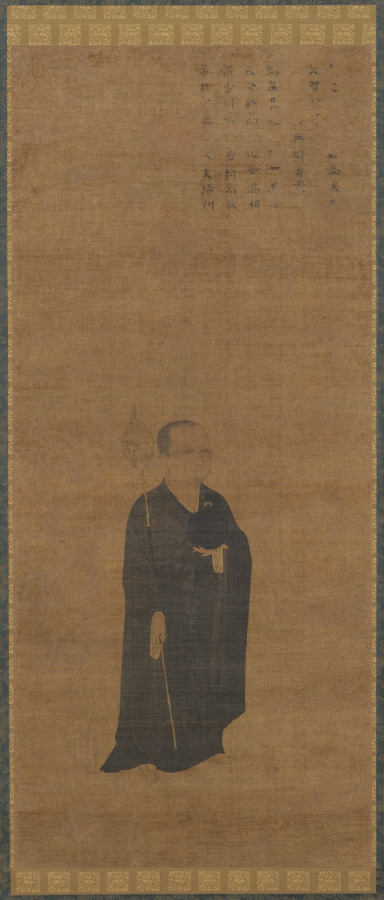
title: Portrait of Priest Dazhi (1048–1116), Master of Law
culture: China, Southern Song dynasty (1127-1279)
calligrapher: Liu Tao (Chinese, late 1000s–early 1100s)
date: 1100s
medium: Hanging scroll; ink and light color on silk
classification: Painting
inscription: Inscription by Liu Tao (late 1000s–early 1100s): Dignified with the perfection of the upasampada,/ His appearance is like his mind;/ Uncompromising and loftily aloof,/ His mind is like his appearance./ To say he is square, he proves to be round;/ He looks timid, yet his spirit is unbound./ Having no attachment, and holding no reins,/ Man and deities alike take refuge in him. (Translation by WKH, 1980)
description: Monk Yuanzhao, with the honorific title Dazhi Lüshi, Great Wisdom Master of Vinaya, is depicted here as an itinerant monk, holding his alms bowl in the left and staff in the right. In 1142, Emperor Gaozong had bestowed Yuanzhao with a posthumous title, mentioned in the inscription, which suggests that the portrait was made after the master’s death. A master of the Lü sect of Buddhism, with a calm benevolent smile on his face, Yuanzhao was active on Mount Tiantai and in Hangzhou. Later, Liu Tao, a southerner from Changxing, added the inscription. The eulogy reads: Dignified he is, perfect in his upasampada [ordination of a monk]. His appearance is like his mind. Uncompromising and aloof. His mind is like his appearance. To say he is square, he proves to be round. He looks timid, yet his spirit is unbound. Having no attachment, and holding no reins, men and deities alike take refuge in him. —translated by Wai-Kam Ho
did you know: A native of Hangzhou, the priest Dazhi was known for his eloquent exposition of Buddhist doctrines and for his success in winning many converts.